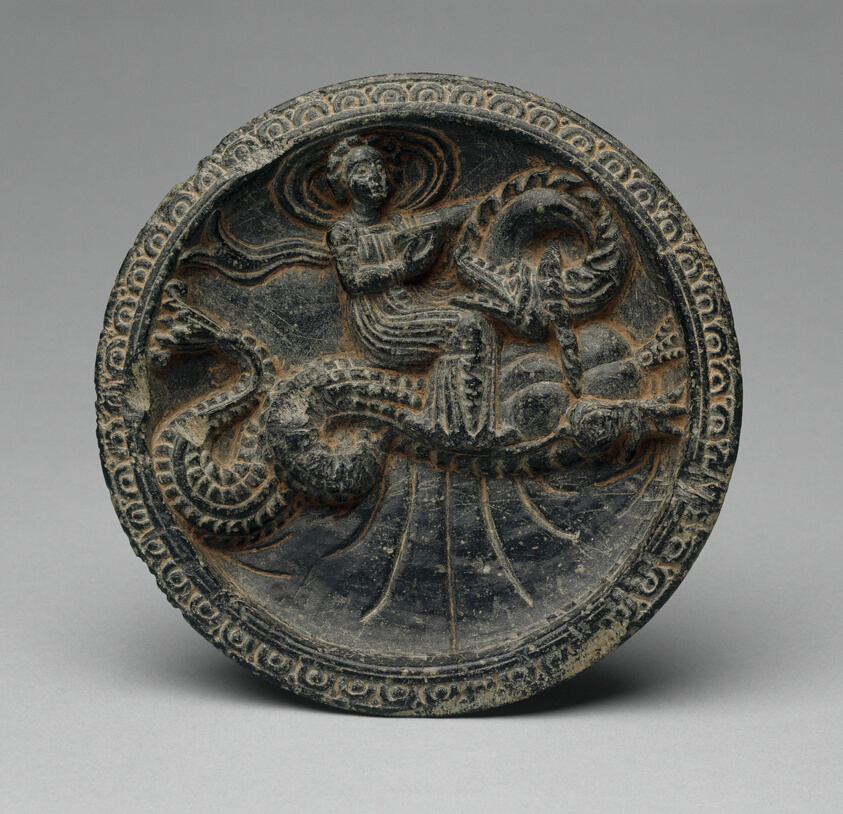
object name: Decorative Arts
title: Palette with Sea Nymph (Nereid) Riding on a Sea Monster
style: South Asian, gandharan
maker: Pakistan; Ancient region of Gandhara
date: 1st century B.C./early 1st century A.D.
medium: Gray chloritic schist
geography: Gandhara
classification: schist; stone; sculpture; asian art; decorative arts